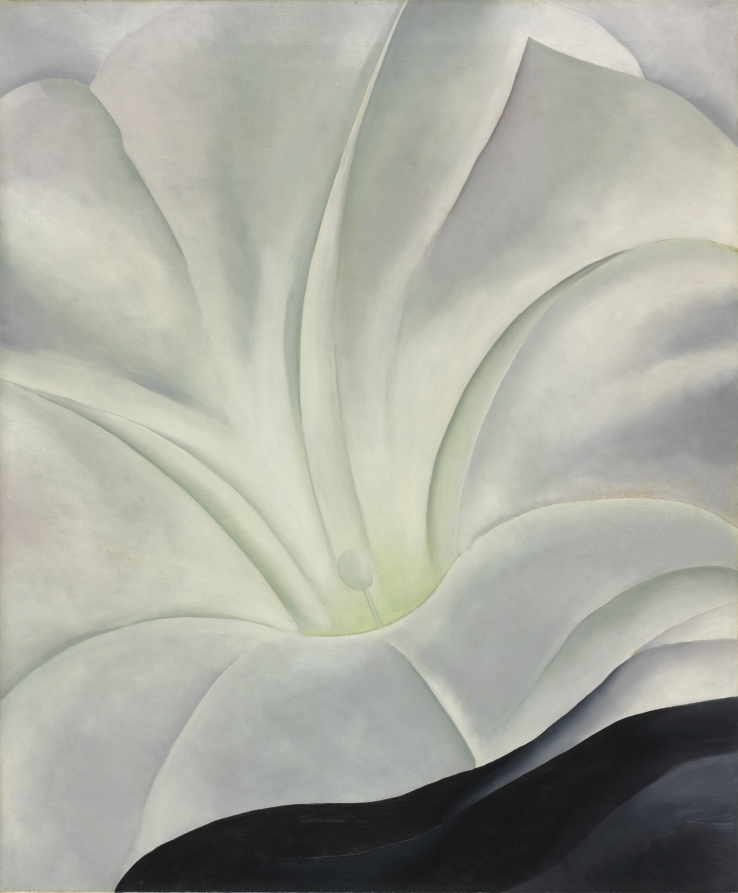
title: Morning Glory with Black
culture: America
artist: Georgia O'Keeffe (American, 1887–1986)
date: 1926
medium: oil on canvas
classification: Painting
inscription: Verso: "G OKeeffe -- 1926" (white paint)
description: O'Keeffe is best known for close-up flower subjects whose magnified forms fill the entire space of each canvas. Likely inspired by similar compositions in modern photography, these images are not only celebrations of nature, but also striking essays in abstract design. Although many critics interpreted O'Keeffe's flower paintings as reflections of femininity in general and female sexuality in particular, the artist strongly opposed such readings. Throughout most of her career, she frequently attempted to persuade others to discuss her work without referring to her gender, writing on one occasion, "I have always been very annoyed at being referred to as a 'woman artist' rather than an 'artist.'"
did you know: The morning glory rests against a black petunia, seen partially at lower right.